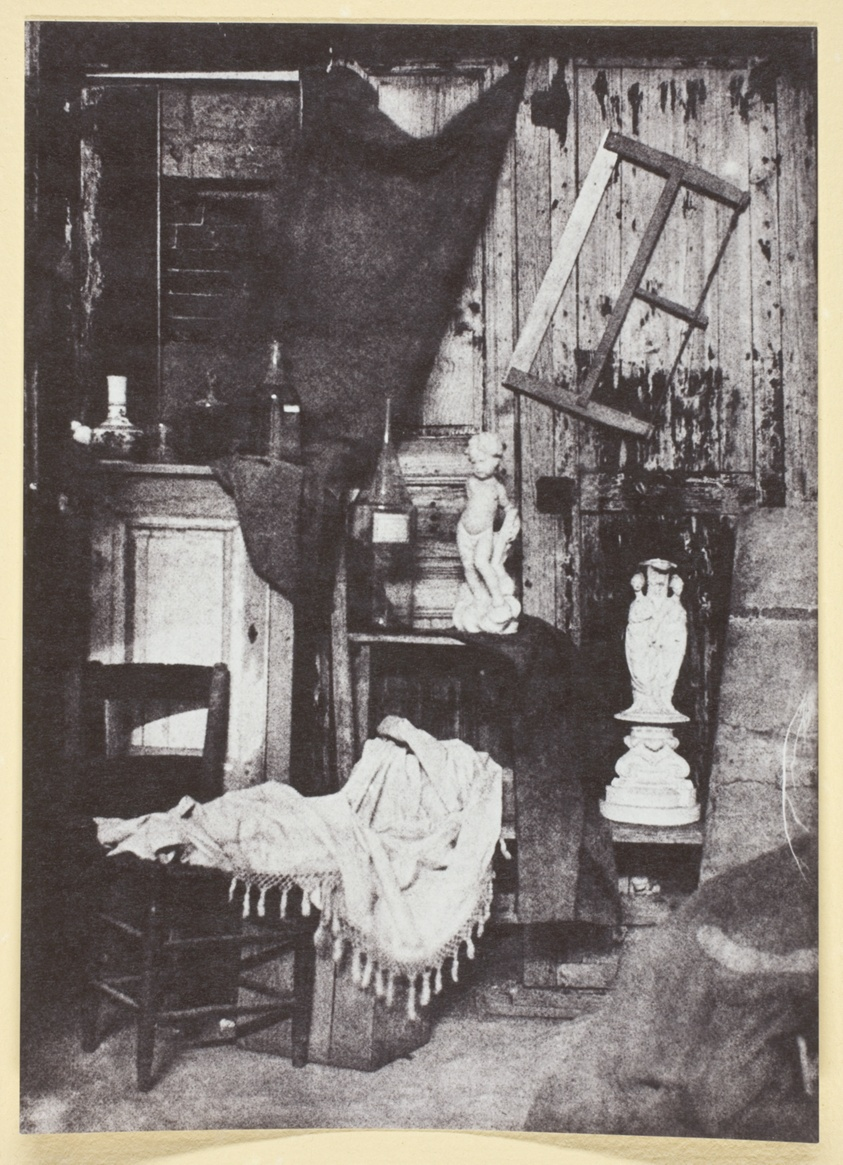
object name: Photograph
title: Grenier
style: 19th century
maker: Hippolyte Bayard (French, 1801–1887)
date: 1842/50, printed 1965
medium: Gelatin silver print, No. 22 from the portfolio "Bayard: XXV Calotypes, 1842-1850" (1965)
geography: France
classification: photographic process; photography; photograph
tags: Collected by Hugh Edwards